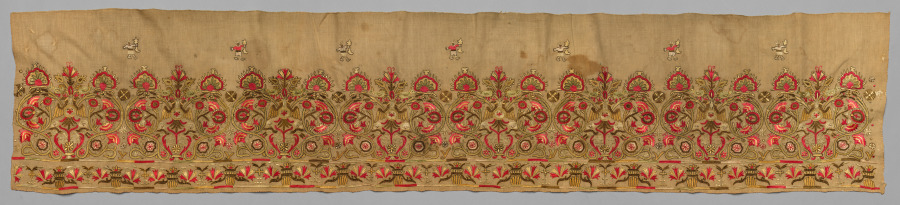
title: Complete Skirt Border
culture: Greece, Crete, 18th century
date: 1700s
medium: embroidery: silk on linen tabby ground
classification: Embroidery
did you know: Above the repeating floral motifs stand six small, evenly spaced figures wearing crowns and carrying maces.